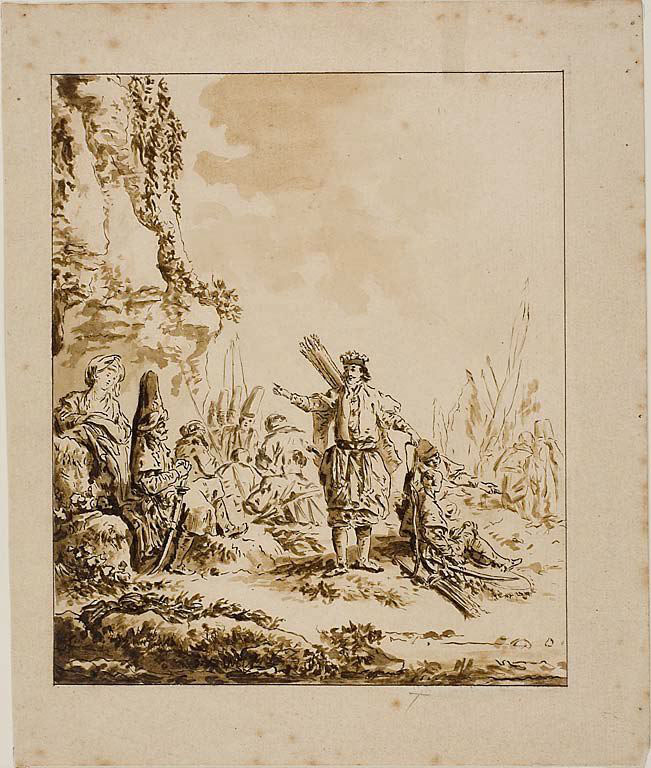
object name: Drawing and Watercolor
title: Copy of Halte de Calmouks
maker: possibly John Kirby Balrey (English, 1754-1828); after Jean-Baptiste Le Prince (French, 1734-1781)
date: c. 1772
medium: Pen and brown ink, with brush and brown wash, over traces of graphite, on buff laid paper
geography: England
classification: ink or chalk wash; drawings (visual works); prints and drawing